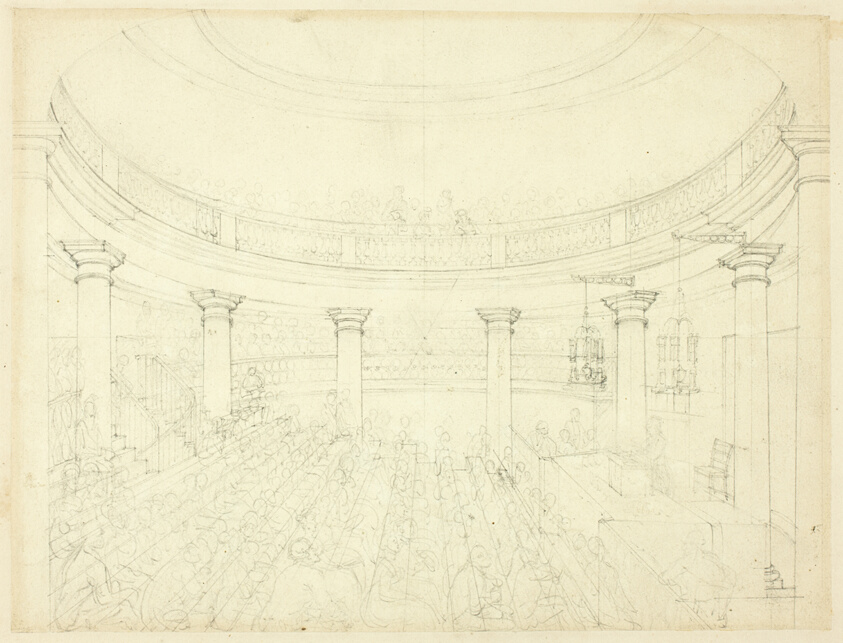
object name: Drawing and Watercolor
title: Study for Surrey Institution, from Microcosm of London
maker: Augustus Charles Pugin (English, born France, 1762-1832); Thomas Rowlandson (English, 1756-1827)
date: c. 1809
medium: Graphite on ivory wove paper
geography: England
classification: graphite; drawings (visual works); prints and drawing